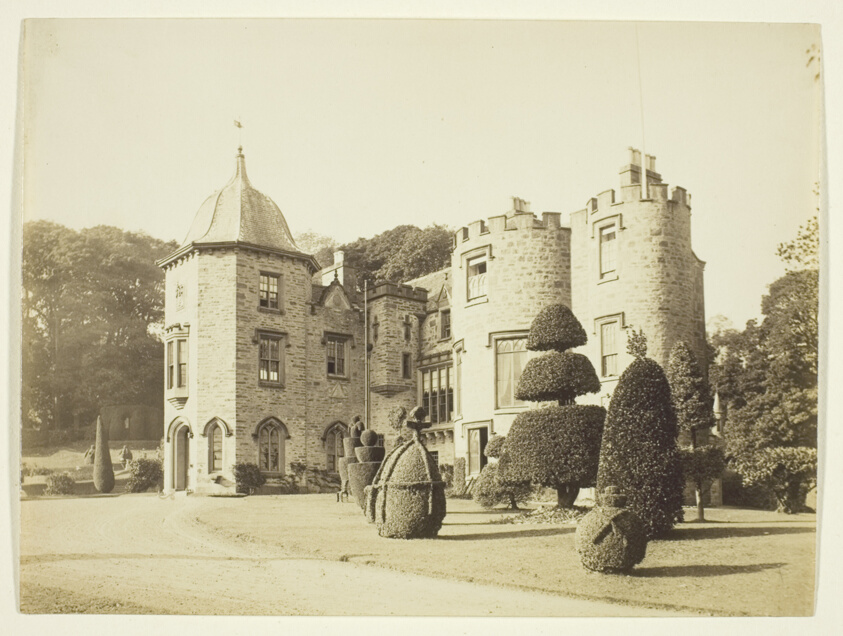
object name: Photograph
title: Untitled (The Corner House, built by Norman Shaw, view of front facade)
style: 19th century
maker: Artist unknown; probably English, 19th century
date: c. 1869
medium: Albumen print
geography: England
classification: albumen silver print; photographic process; photography; photograph